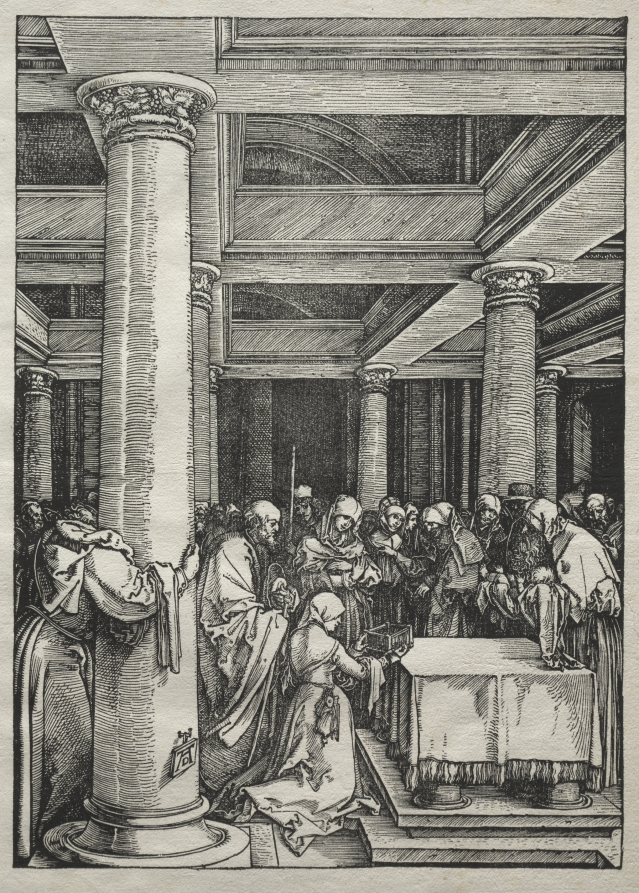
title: Life of the Virgin: Presentation of Jesus in the Temple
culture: Germany, early 16th Century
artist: Albrecht Dürer (German, 1471–1528)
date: 1504–1505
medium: woodcut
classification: Print